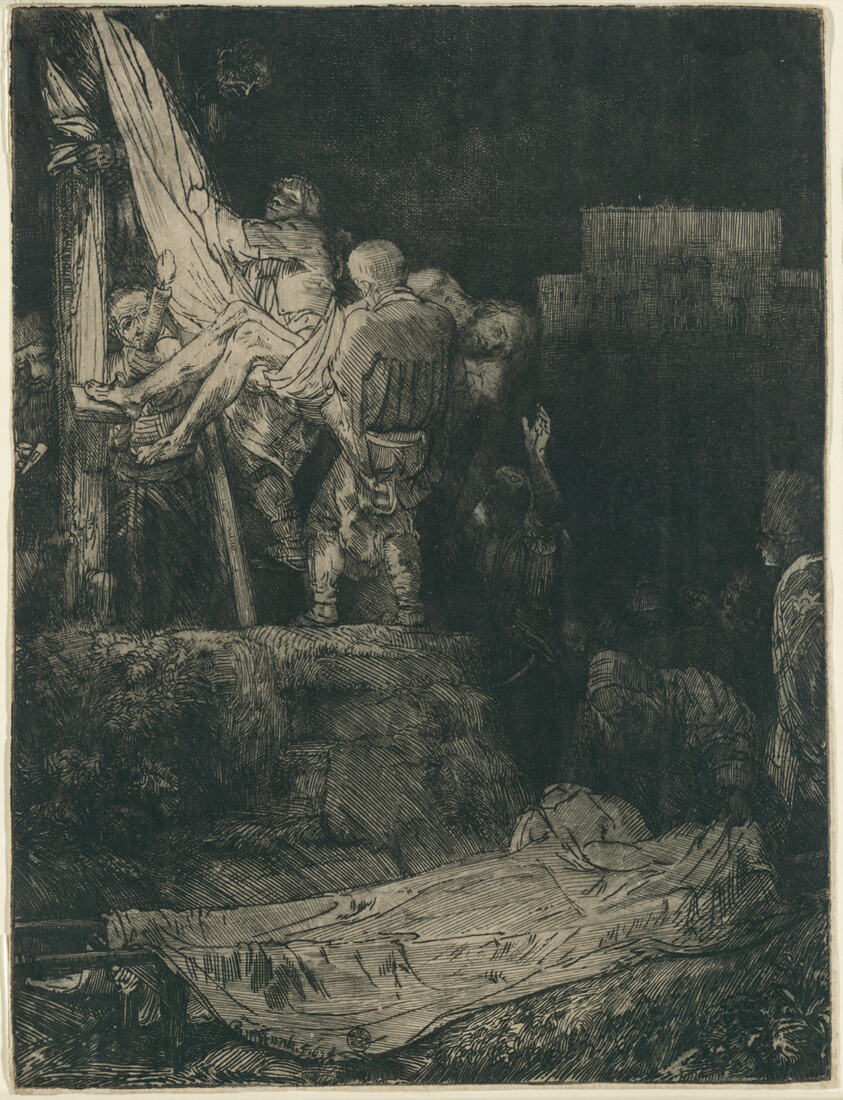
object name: Print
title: The Descent from the Cross by Torchlight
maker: Rembrandt van Rijn (Dutch, 1606-1669)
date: 1654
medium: Etching and drypoint on ivory Japanese paper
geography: Netherlands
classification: etching; print; prints and drawing; paper; drypoint